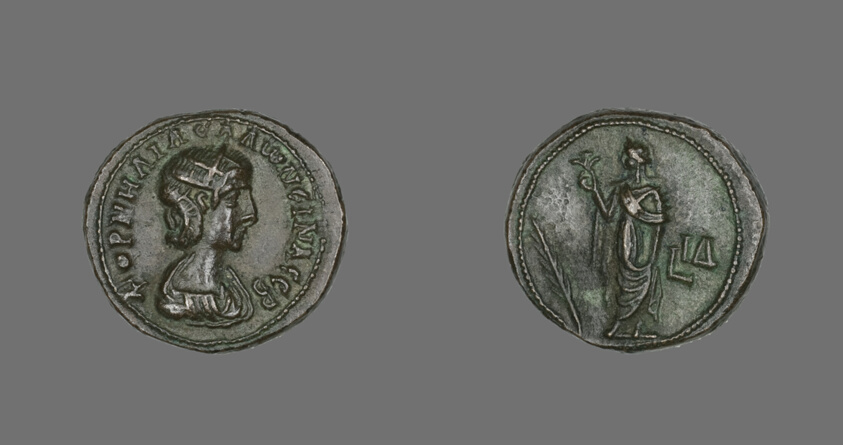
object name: Coin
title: Coin Portraying Empress Salonina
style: roman (ancient, style or period), ancient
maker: Roman, minted in Alexandria, Egypt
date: 266-267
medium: Billon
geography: Roman Empire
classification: coin; ancient art